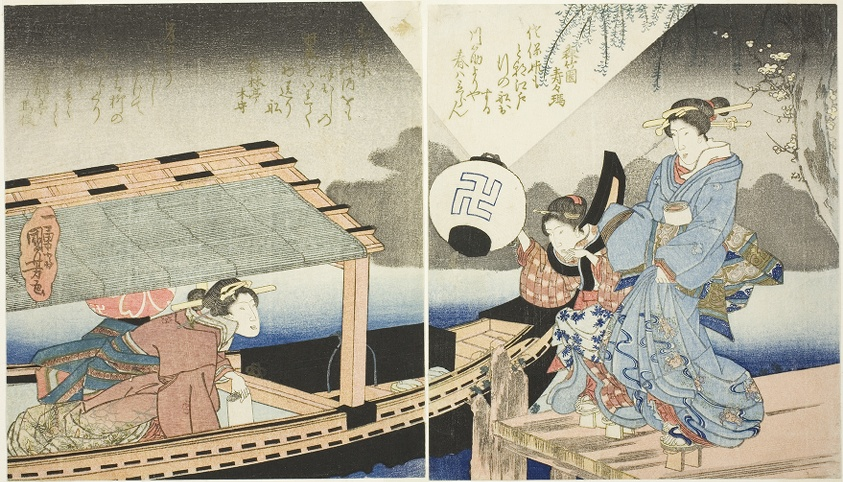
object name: Print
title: Night scence aboard a pleasure boat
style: Japanese (culture or style)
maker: Utagawa Kuniyoshi (Japanese, 1787-1861)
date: c. 1830's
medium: Color woodblock print; shikishiban diptych, surimono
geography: Japan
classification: print; asian art